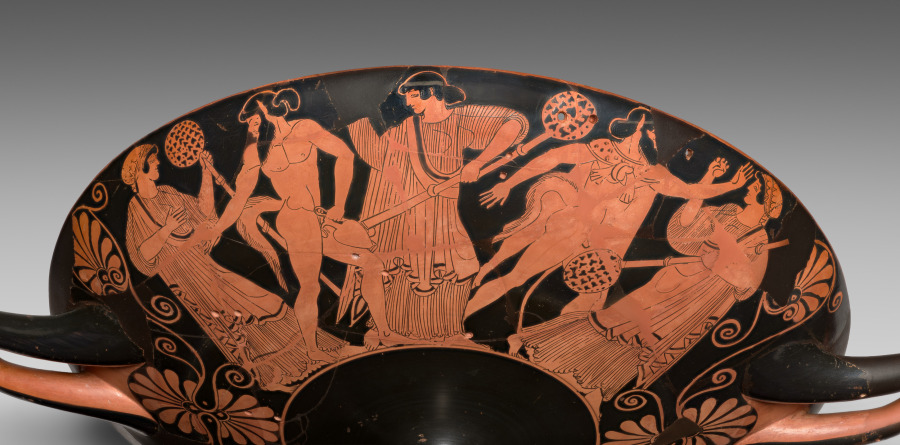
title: Red-Figure Kylix (Drinking Cup): Dionysos and Satyr (I); Satyrs and Maenads (A, B)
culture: Greece, Athens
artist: attributed to Douris (Greek, Attic, active c. 500–470 BCE)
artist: or Painter of London E 55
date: c. 480 BCE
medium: ceramic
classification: Ceramic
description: Reconstructed from 72 fragments, this cup has been repaired several times, indicating its enduring value to owners. Pairs of holes straddling cracks once held ancient wire or clamp repairs. Numerous incomplete holes may signify recent interventions. Early modern efforts to hide cracks and certain features of the satyrs that could have offended sensibilities of the time also masked the original artistry of its painting. So, for many years the cup languished in storage. Cleaning and reconstruction in 1952–53 revealed enough to allow attribution to a respected vase painter, Douris, reviving the cup’s reputation. More recently, a different attribution has been suggested, and a new conservation campaign replaced ancient parts from a different cup with modern reconstructions more like those lost.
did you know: In the tondo, a dancing satyr approaches the wine god Dionysos, who holds a kantharos and grapevine.